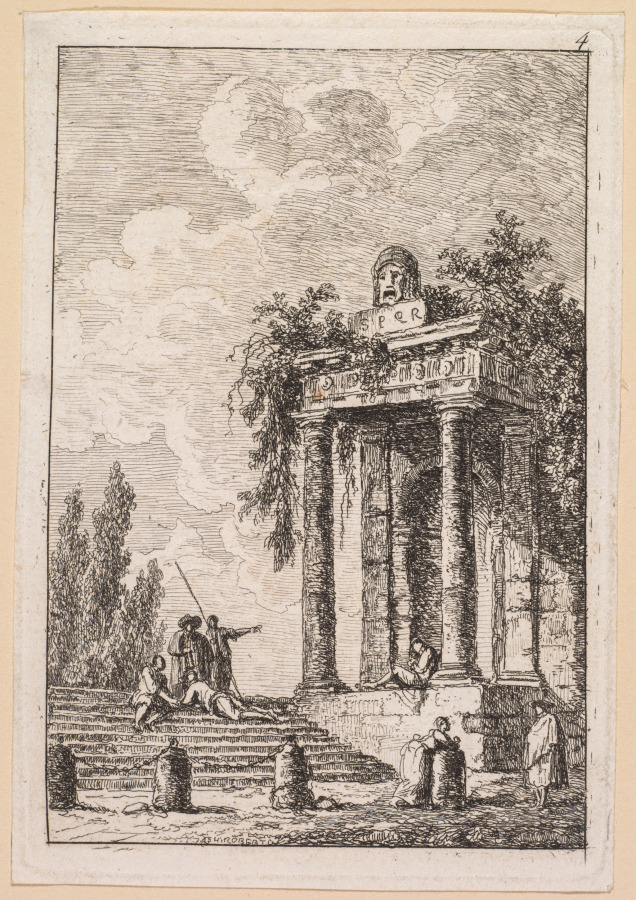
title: Les Soirées de Rome: L'Escalier aux quatre bornes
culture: France, 18th century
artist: Hubert Robert (French, 1733–1808)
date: 1763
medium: etching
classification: Print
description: Derived from his own pen-and-ink drawings, this suite of etchings features fictional characters situated near recognizable buildings and statues in Rome. On the title page, Robert dedicated the suite to Marguerite Le Compte, who visited Rome in 1764 in the company of the wealthy author and art enthusiast Claude Henri Watelet. Both Le Compte and Watelet were amateur etchers, and they socialized with a group that included artists and printmakers centered at the academies in Italy. Robert’s dedication was likely motivated by the hope of future patronage from Le Compte. She may be the generous woman with a hand muff depicted in The Ancient Temple, the fifth scene in this series.